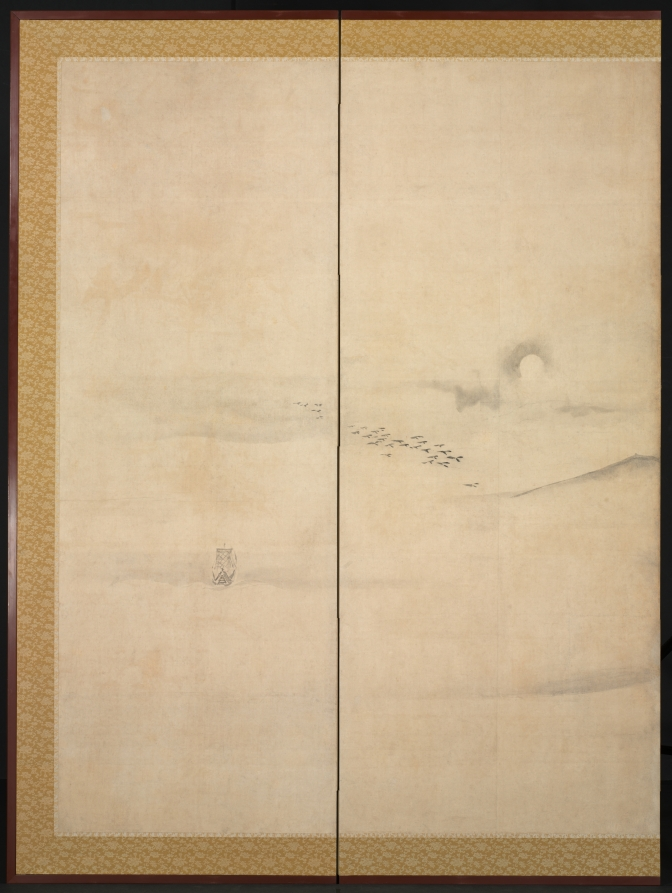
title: Eight Views of the Xiao and Xiang Rivers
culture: Japan, Edo period (1615–1868)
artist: Watanabe Shikō (Japanese, 1683–1755)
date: 1700s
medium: Six-panel folding screen, ink on paper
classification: Painting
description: Watanabe Shiko, an Edo period painter who combined Kano school style with Rimpa style, re-created the Xiao and the Xiang rivers on a pair of eight-panel screens. For this composition, he followed the Kano school’s sense of space, adapted from miniature copying paintings (shukuzu) by the Japanese artist Kano Tanyu. Watanabe revised the typical representations of the Xiao and the Xiang rivers by rendering the theme Wild Geese Descending to Sandbar on the right screen and Evening Bell from Mist-Shrouded Temple on the left screen. He depicted simple motifs—moon, boat, geese, and temple—to suggest the other scenes while also creating airy space.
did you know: This screen forms a pair with CMA 1960.284.